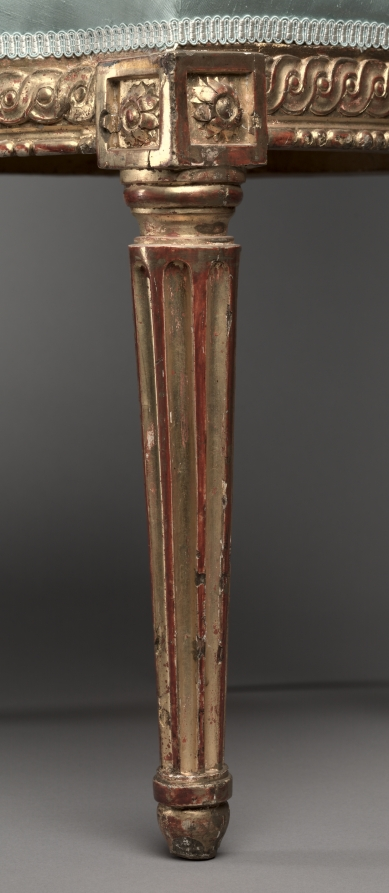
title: Side Chair (1 of 2)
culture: France, style of Louis XVI, 18th century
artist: Jean Baptiste fils Lelarge (French, 1743–1802)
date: 1700s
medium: gilded wood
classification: Furniture and woodwork